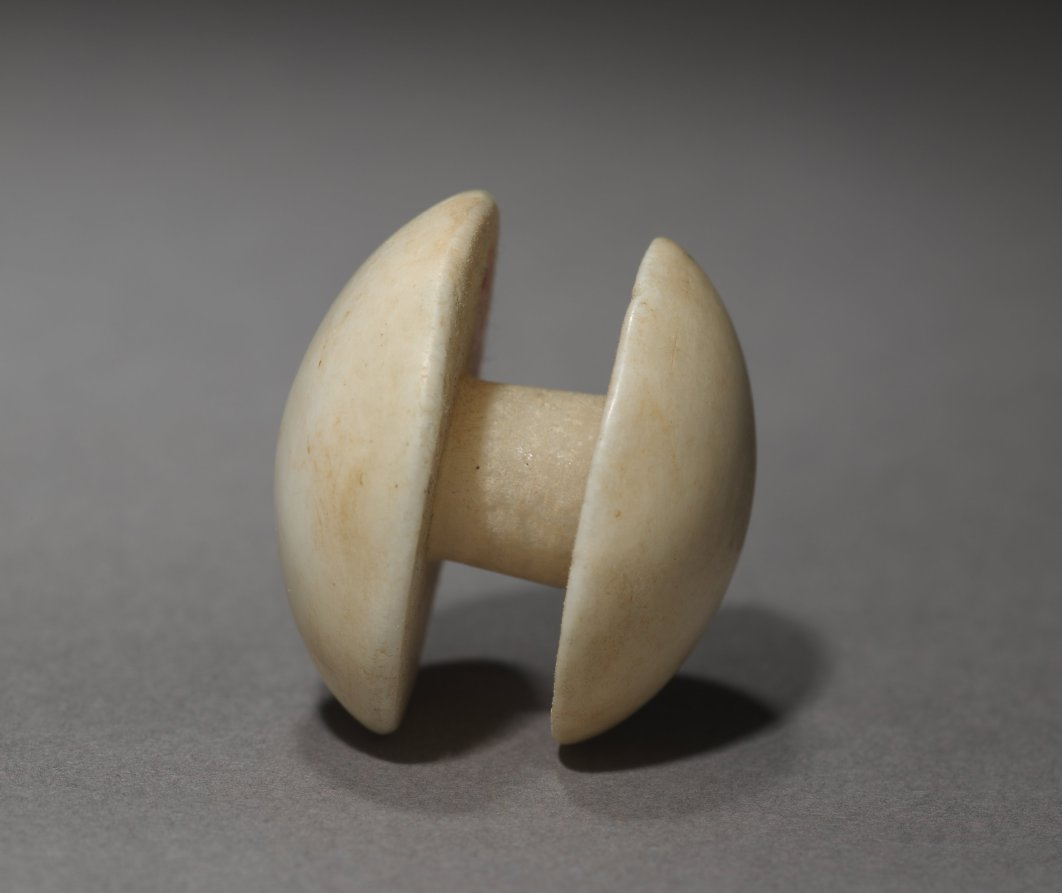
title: Pair of Earrings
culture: Egypt, New Kingdom (1540–1069 BCE), Dynasty 18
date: 1540–1296 BCE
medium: travertine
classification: Jewelry